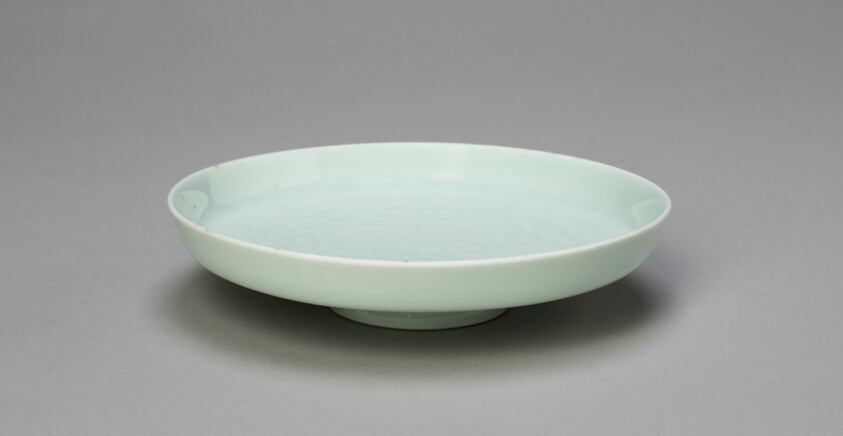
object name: Vessel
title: Dish with Auspicious Emblems: Clouds, Bats, Gourds, Plaintain, and Ruyi Scepter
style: Chinese (culture or style)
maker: China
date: Qing dynasty (1644–1911), Qianlong period (1736–1795)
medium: Porcelain with underglaze molded decoration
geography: China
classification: dish (vessel); porcelain; asian art; ceramics; vessel